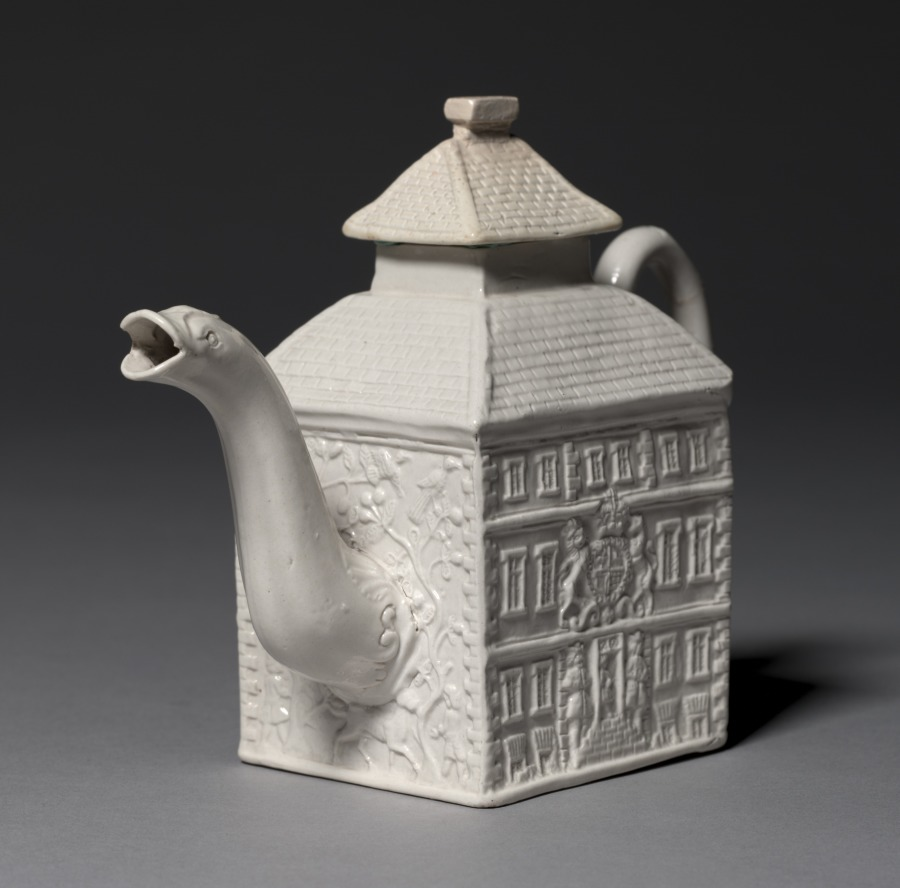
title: Teapot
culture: England, Staffordshire, 18th century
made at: Staffordshire Factory (British)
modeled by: Aaron Wood (British)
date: 1740–1750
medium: salt-glazed earthenware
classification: Ceramic